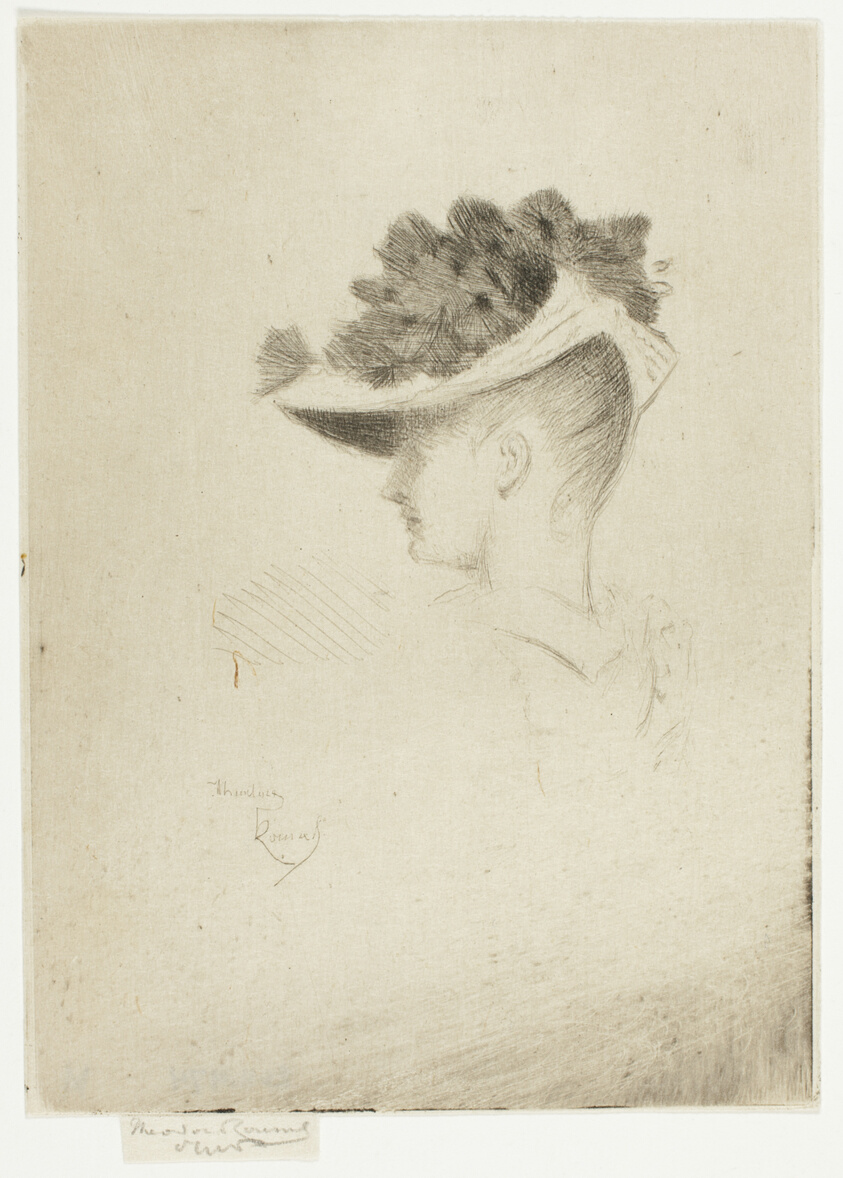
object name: Print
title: The Henley Hat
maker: Theodore Roussel (French, worked in England, 1847-1926)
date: 1890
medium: Drypoint in black on ivory Japanese paper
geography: England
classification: drypoint; print; prints and drawing